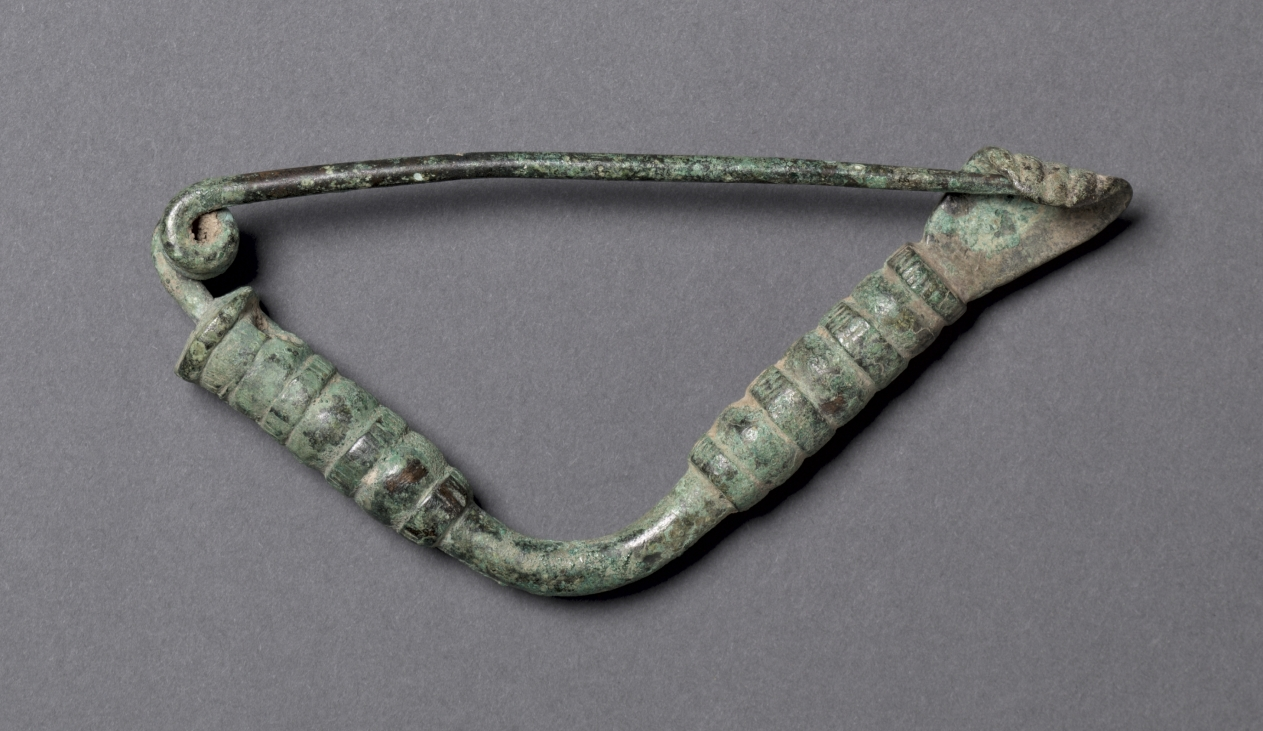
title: Fibula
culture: Persia (Iran or Iraq)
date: 600s BCE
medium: bronze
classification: Jewelry